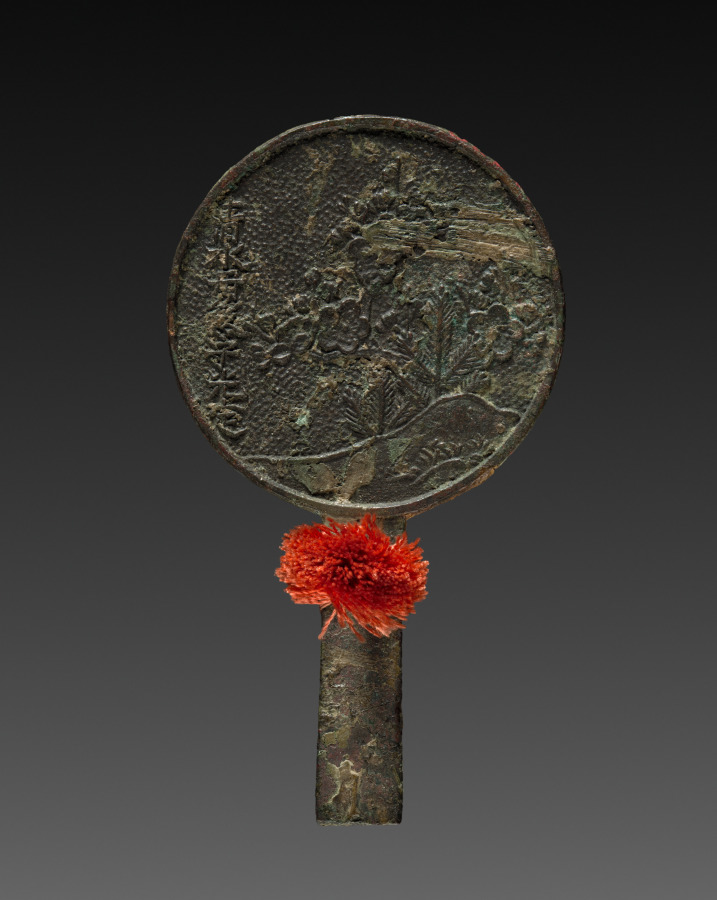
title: Mirror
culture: Japan, Edo period (1615–1868)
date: 1615–1868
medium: bronze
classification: Metalwork